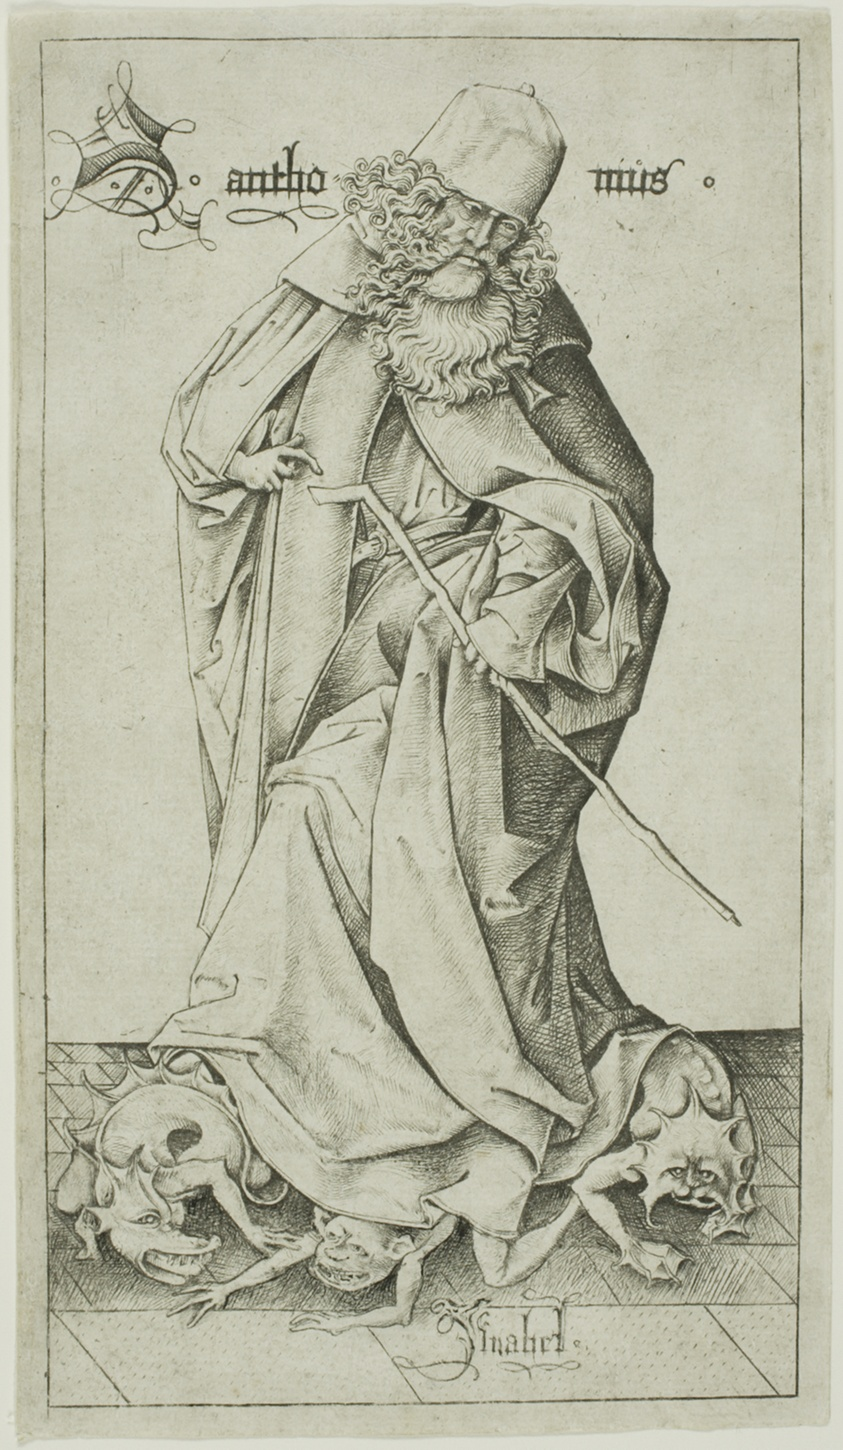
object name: Print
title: St. Anthony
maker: Israhel van Meckenem the Younger; German, c. 1440/45-1503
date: 1470–75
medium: Engraving on ivory laid paper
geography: Germany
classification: engraving; print; prints and drawing